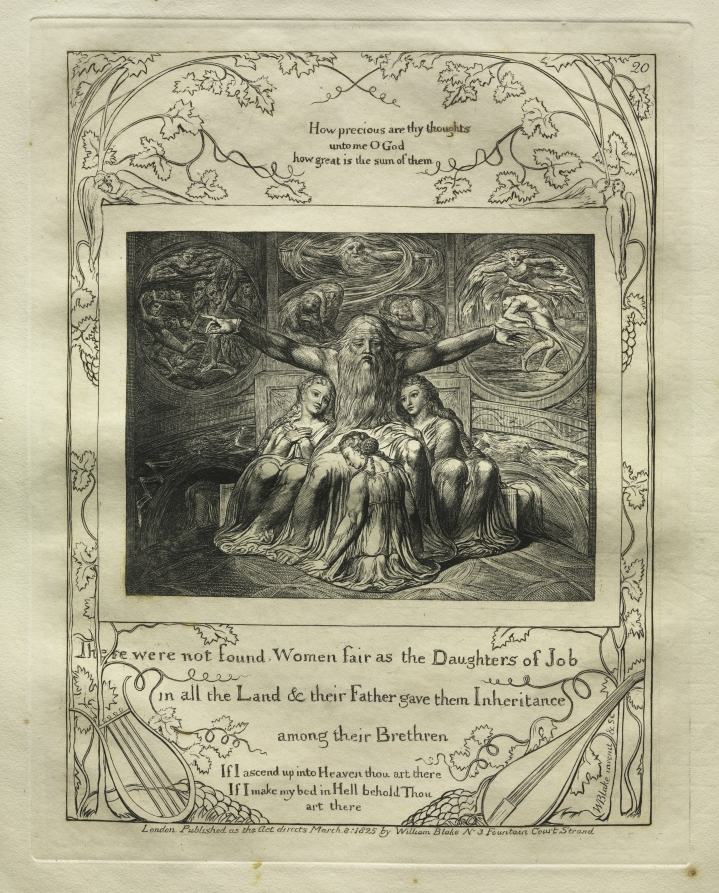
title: The Book of Job: Pl. 20, There were not found Women fair as the Daughters of Job / in all the Land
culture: England, 19th century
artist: William Blake (British, 1757–1827)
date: 1825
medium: engraving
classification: Print